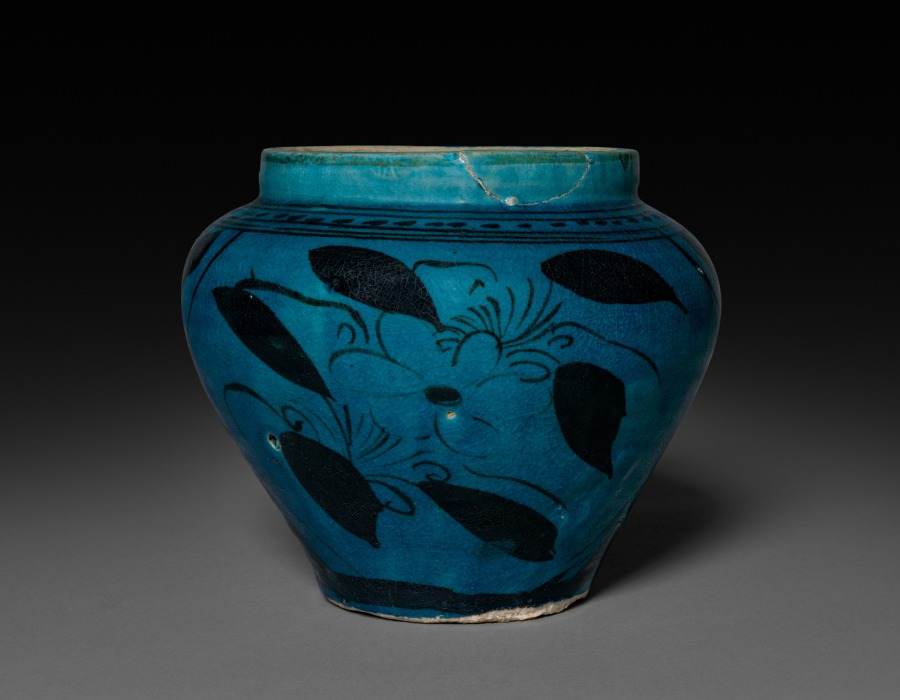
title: Jar: Cizhou ware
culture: China, Yuan dynasty (1271-1368)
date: 1271–1368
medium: stoneware with slip coating, turquoise glaze and painted underglaze decoration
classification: Ceramic